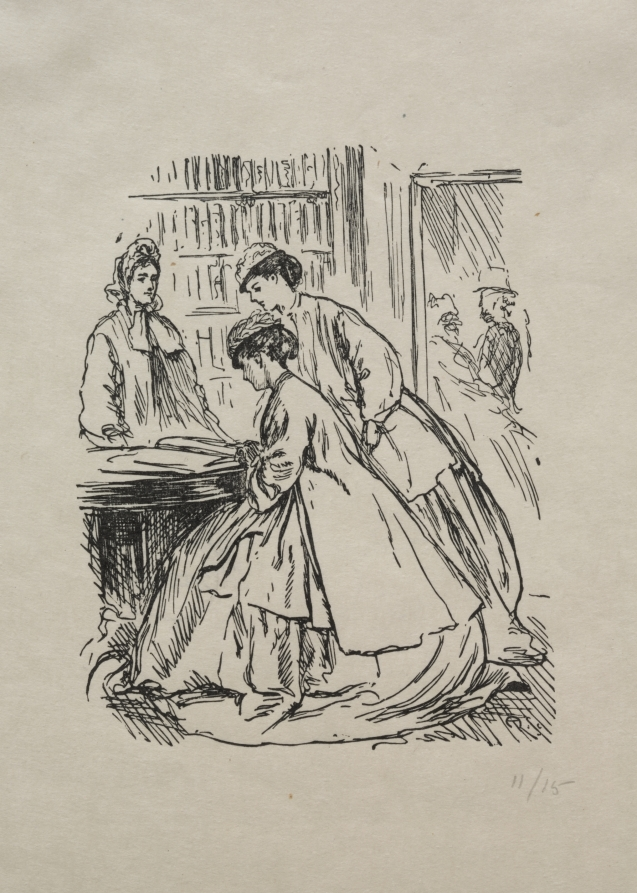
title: Much Ado about Nothing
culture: England, 19th century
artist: George Louis Palmella Busson Du Maurier (British, 1834–1896)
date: 1866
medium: wood engraving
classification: Print